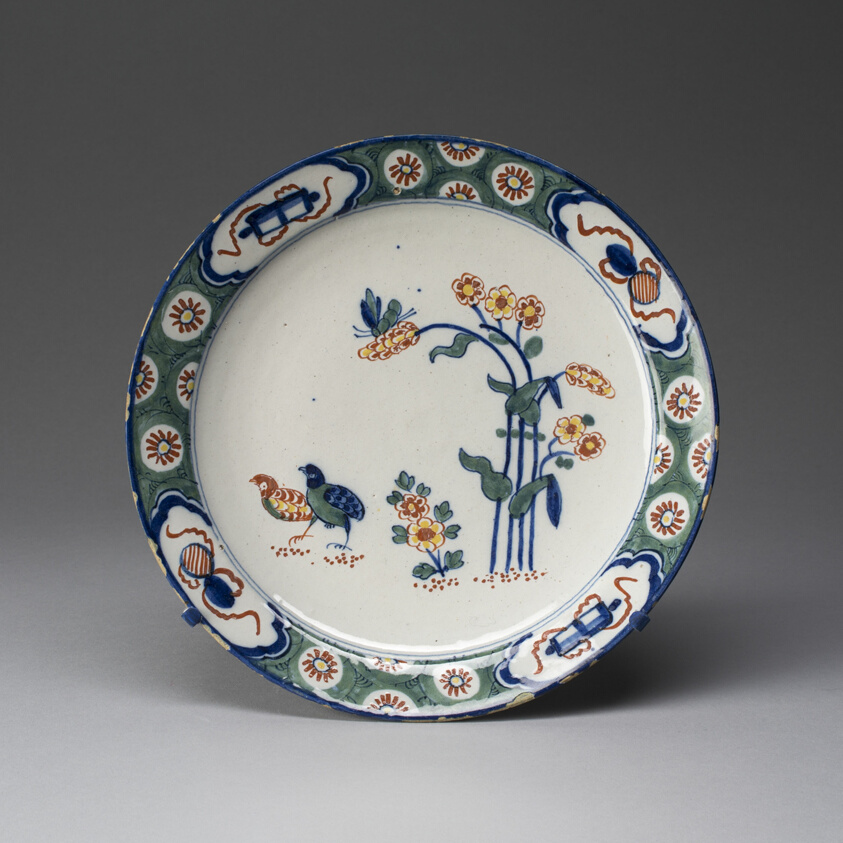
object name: Ceramics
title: Plate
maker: Delft, Netherlands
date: c. 1750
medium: Tin-glazed earthenware (Delftware)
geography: Delft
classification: plate (general, dish); dish (vessel); earthenware; ceramics; european decorative arts; tin-glazed ware